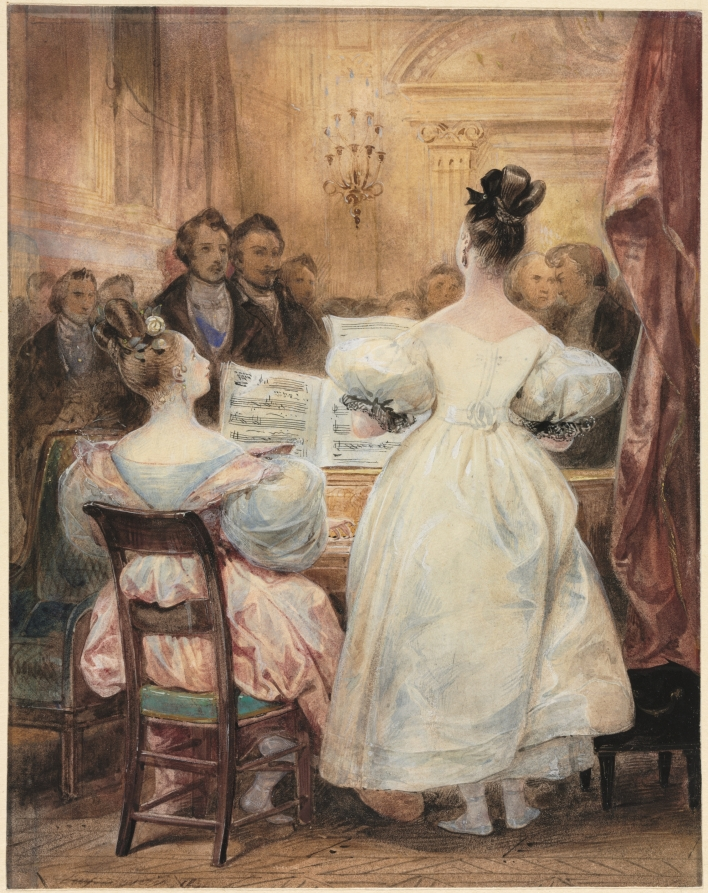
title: A Concert: Laura Devéria Singing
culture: France, 19th century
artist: Eugène François Marie Joseph Devéria (French, 1805–1865)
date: 1831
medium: watercolor with black and brown ink, some pastel and lead white on off-white heavy-weight wove paper mounted to heavy white cream wove paper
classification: Drawing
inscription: Signed and dated, lower left in brown ink: Eug. Deveria 1831